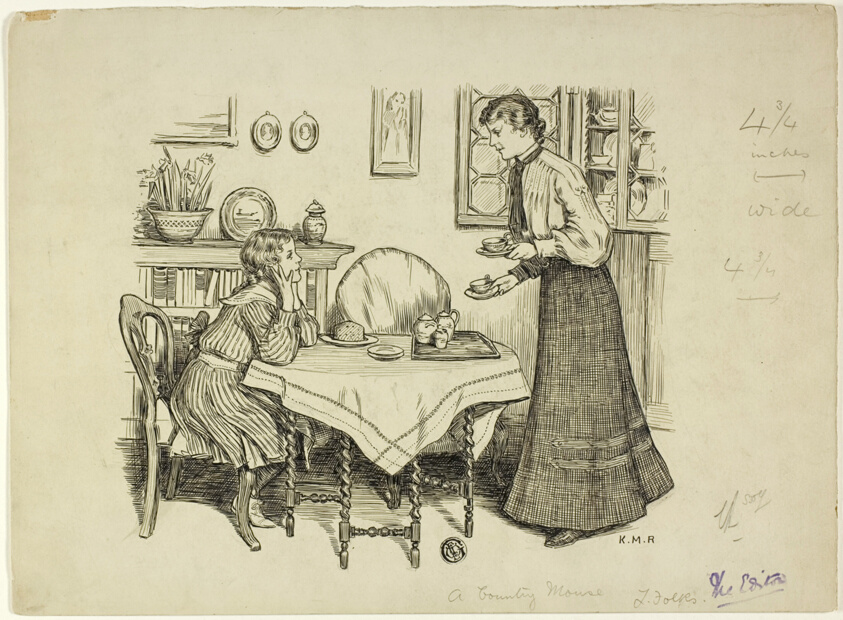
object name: Drawing and Watercolor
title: A Country Mouse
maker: Katherine May Roberts (English, active 1900-1913)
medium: Pen and black ink, over graphite, on cream card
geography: England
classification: pen and ink drawings; drawings (visual works); prints and drawing